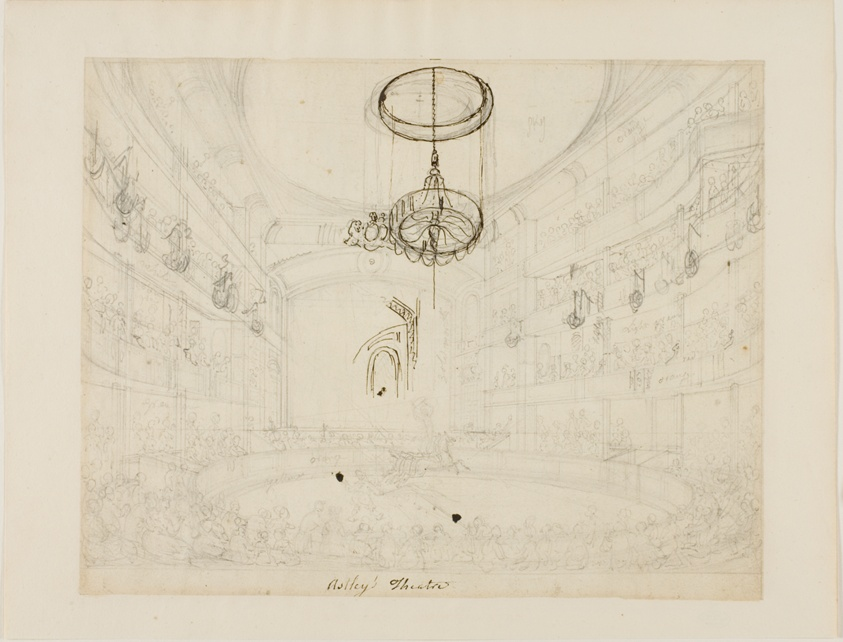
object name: Drawing and Watercolor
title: Study for Astley's Theatre (recto); Study for Crystal Chadeliers in Astley's Amphiteatre (verso)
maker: Augustus Charles Pugin (English, born France, 1762-1832); Thomas Rowlandson (English, 1756-1827)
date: c. 1808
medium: Graphite with pen and brown ink (recto), and graphite (verso), on cream wove paper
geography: England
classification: graphite; drawings (visual works); prints and drawing